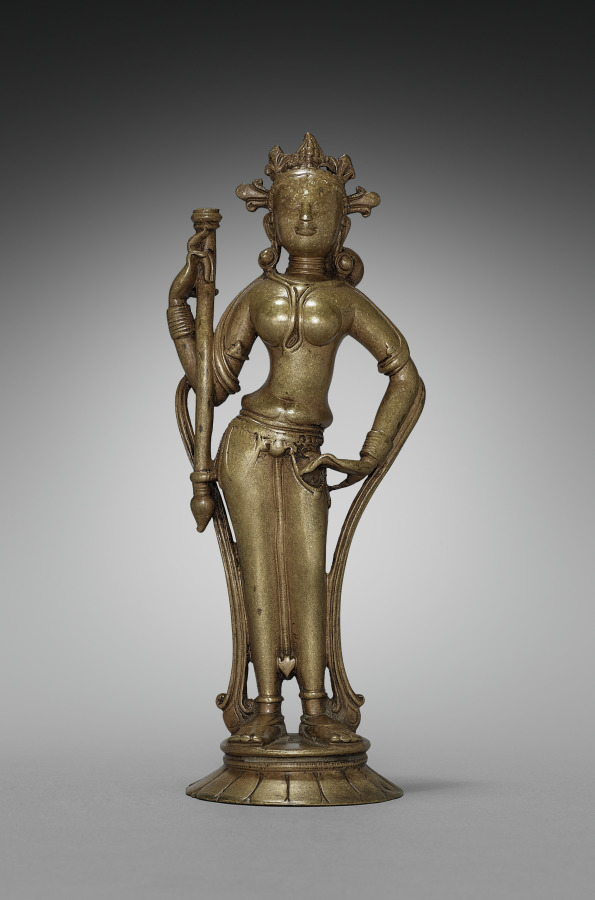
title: Standing Devi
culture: India, Ladakh, 12th century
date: 1100s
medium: brass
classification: Sculpture